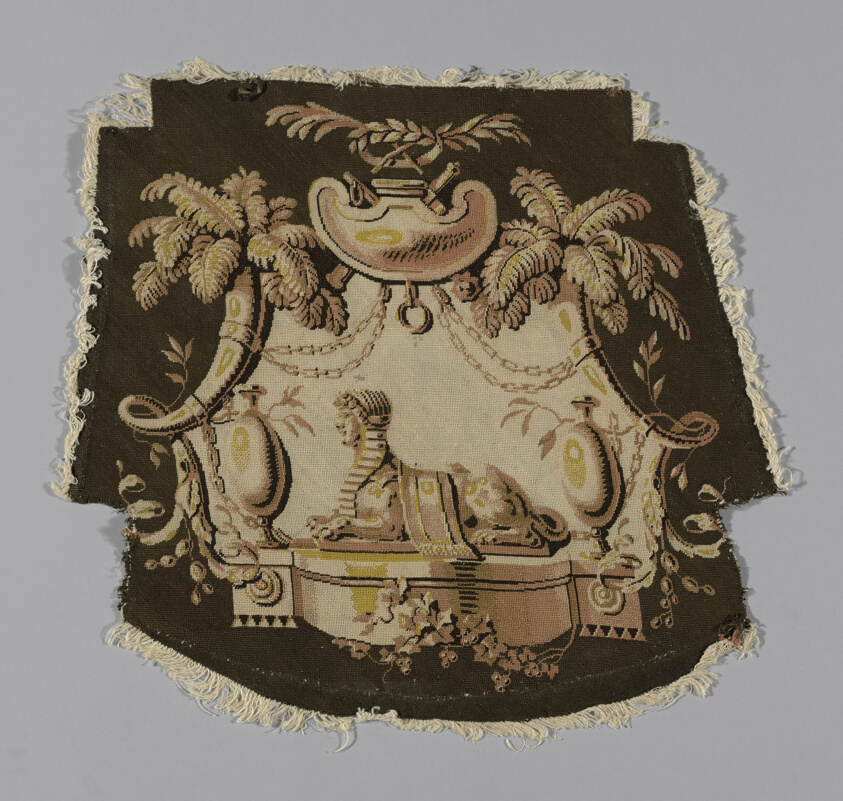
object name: Textile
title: Chair Cover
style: empire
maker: England or France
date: Empire period, c. 1810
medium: Linen, plain weave; embroidered with silk in back and tent stitches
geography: England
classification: textile; needlework (visual works)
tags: swags, foliage, funerary art, urns